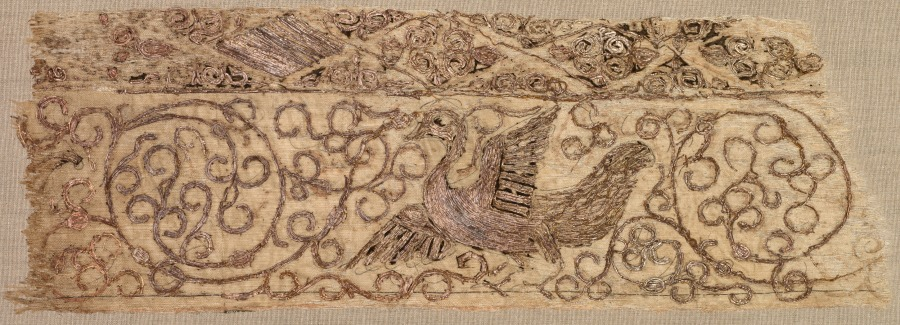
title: Embroidered fragment with bird among vines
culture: Iraq, Baghdad, Seljuq period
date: 1100s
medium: plain weave: silk warp and cotton weft (mulham); embroidery, couched and split stitches: silk and metallic thread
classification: Textile